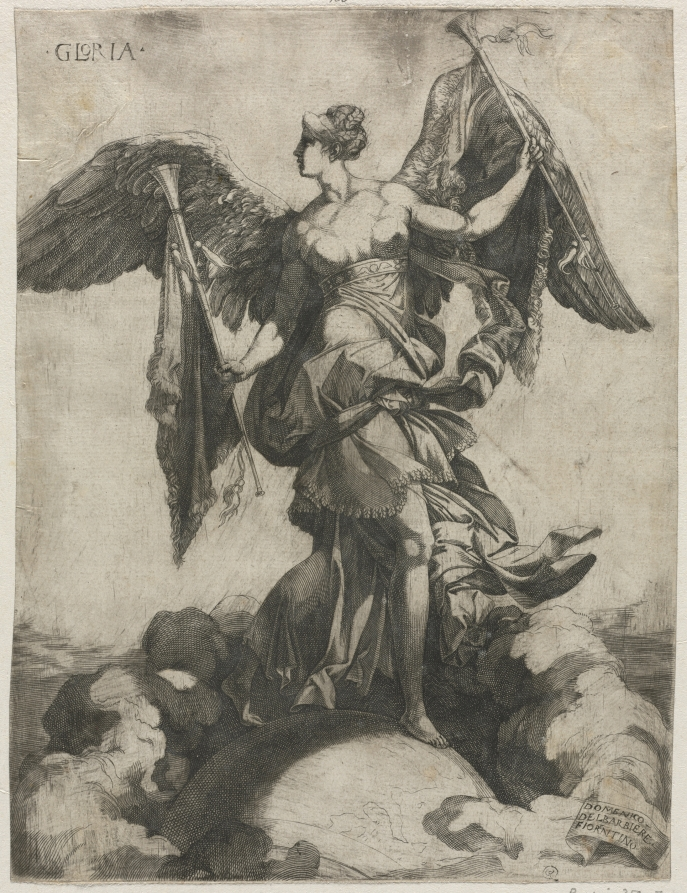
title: Gloria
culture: Italy, 16th century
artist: Domenico del Barbiere (Italian, c. 1506–c. 1571)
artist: after Rosso Fiorentino (Italian, 1494–1540)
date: 1535 or 1536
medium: engraving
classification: Print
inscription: upper left, in plate: · GLORIA· ; lower left, in plate: DOMENICO-- / DELBARBIERE· / FIORENTINO ; SECONDARY SUPPORT, upper center, in graphite: 103 ; lower right, in graphite: B. xvi. 359.7 / Zerner 9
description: This print is based on a drawing that Rosso Fiorentino made as part of a design for a fresco in François I’s chateau at Fontainebleau in France. A personified Gloria (or Fame) holds a trumpet in each hand, a symbol of victory, while standing atop a globe, signifying dominance over time and death. Although a clear inspiration, the powerful muscular and sculptural quality of Michelangelo’s nudes are in this figure transformed into a distorted, excessively elongated torso. Such a body was not the result of drawing from a live model but instead derived from the artist’s imagination.